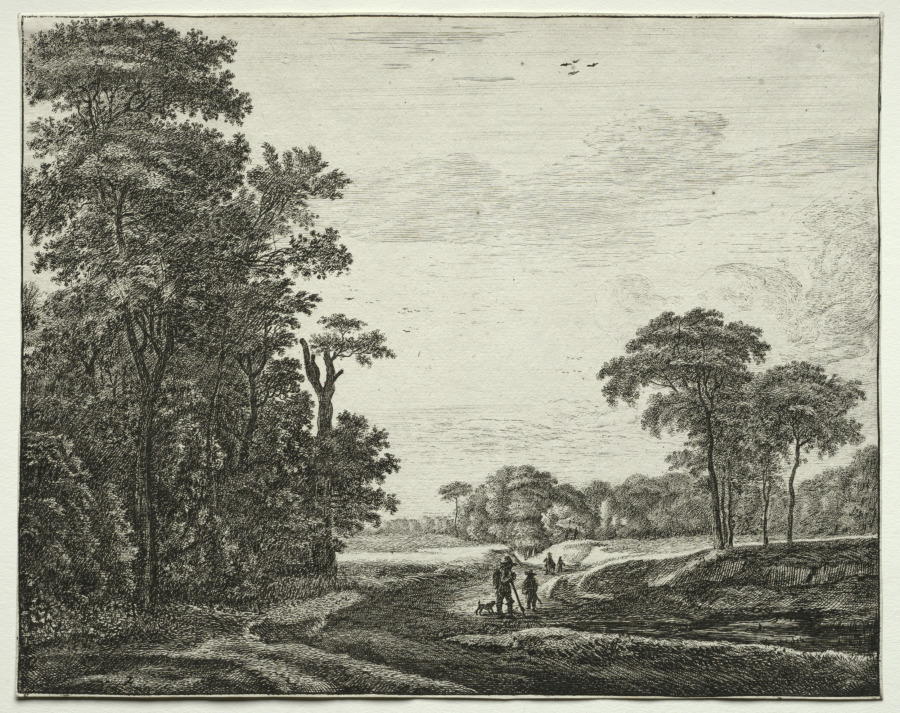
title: Six views in the Wood of the Hague: Plate 2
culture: Netherlands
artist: Roelant Roghman (Dutch, 1627–1692)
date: 1640–52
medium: etching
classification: Print